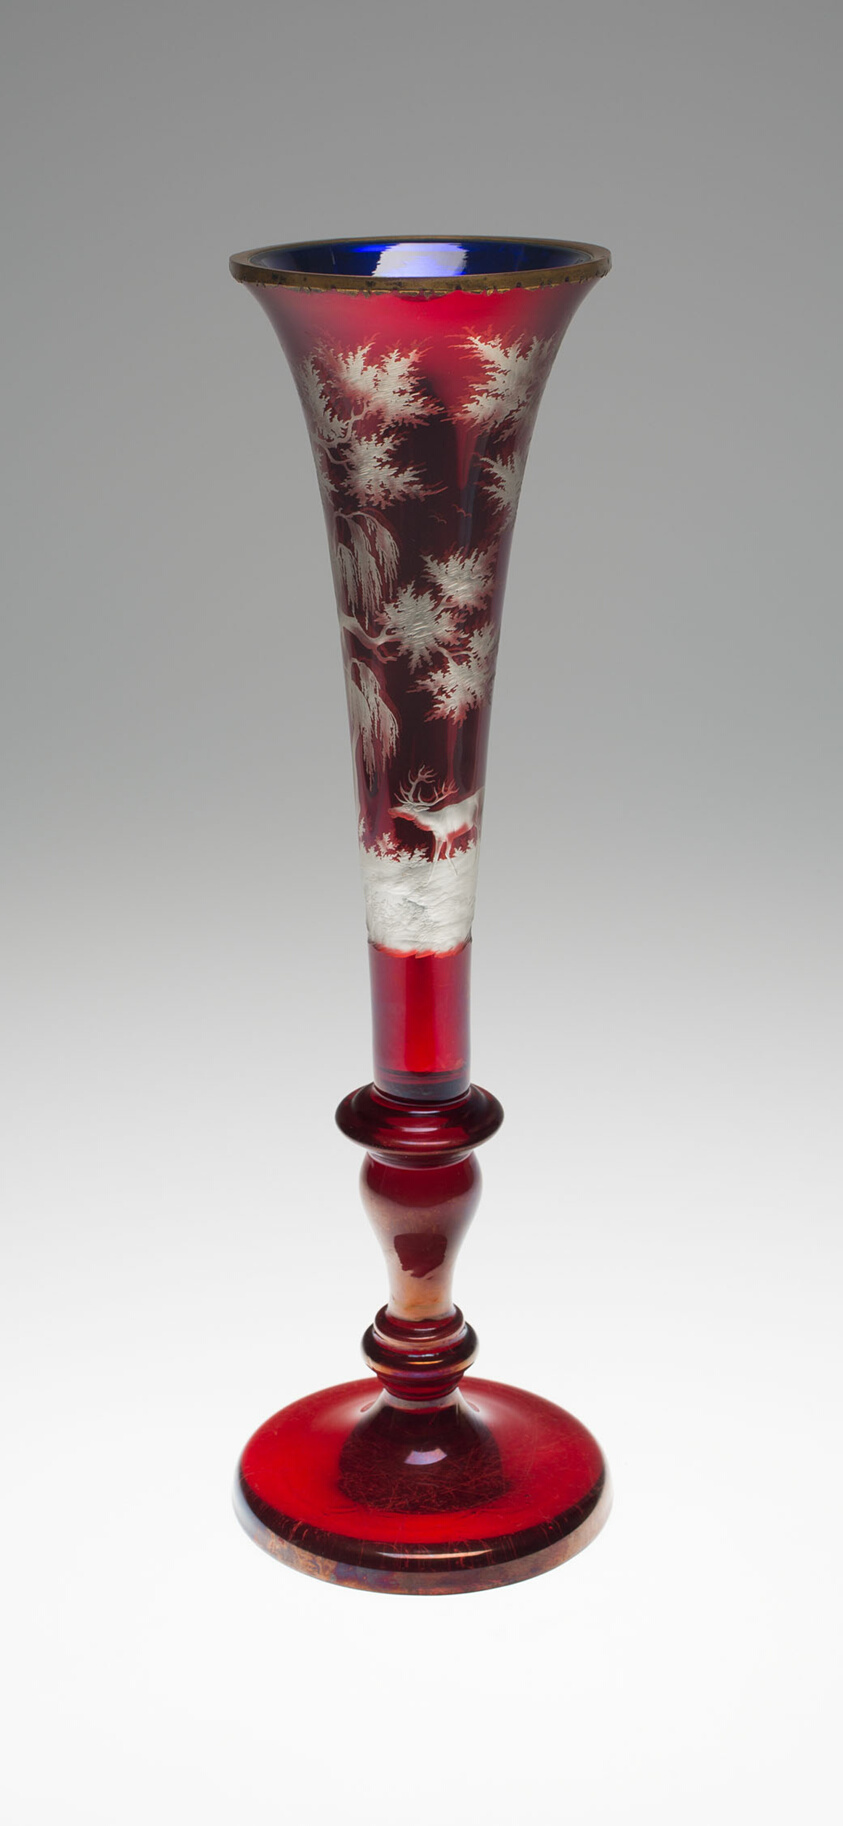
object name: Glass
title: Vase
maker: England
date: c. 1850/60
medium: Glass and metal; formed in two parts and joined by a gilt metal (probably brass) collar at rim; the exterior, blown clear glass, stained ruby and engraved; the interior, blown cobalt blue glass, with the interiors of both parts silvered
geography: England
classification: vase; vessel; glass; european decorative arts